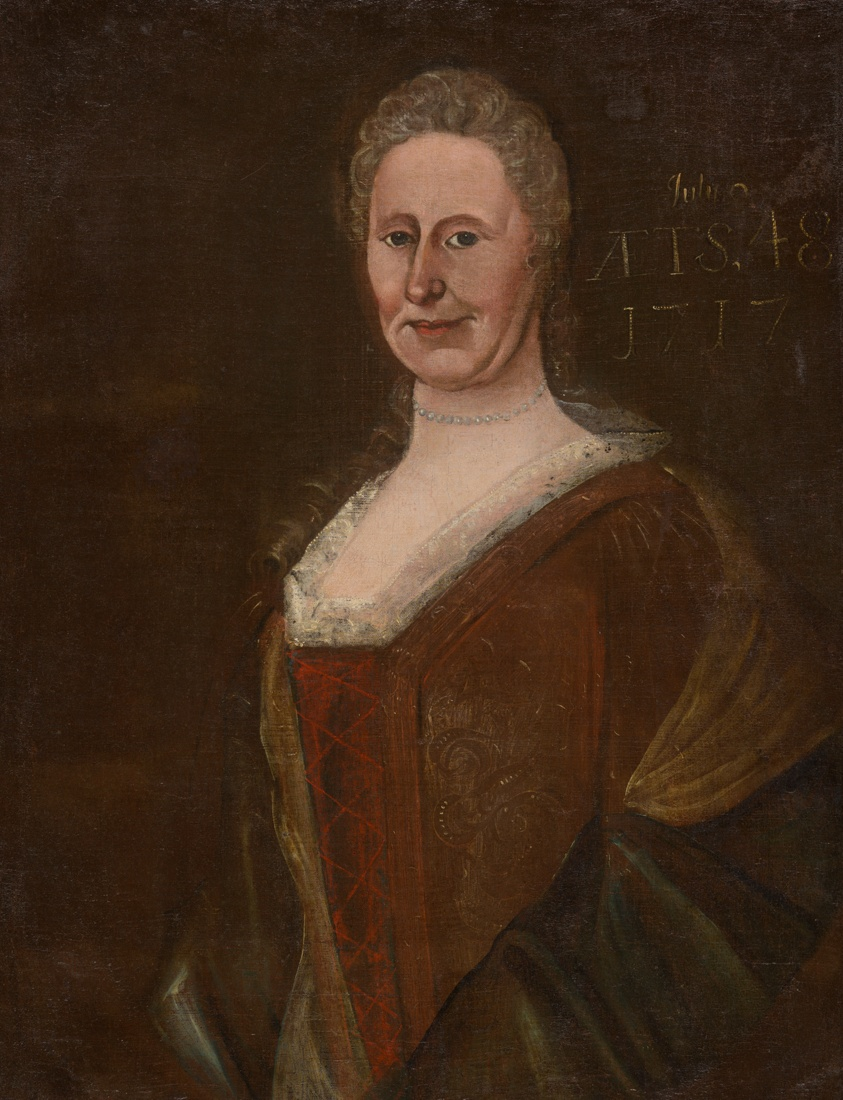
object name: Painting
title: Mrs. Vanderveer, or Mrs. Vandeveer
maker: Artist unknown (American, 18th century); Formerly attributed to John Watson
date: 1717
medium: Oil on canvas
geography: United States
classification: painting; american arts